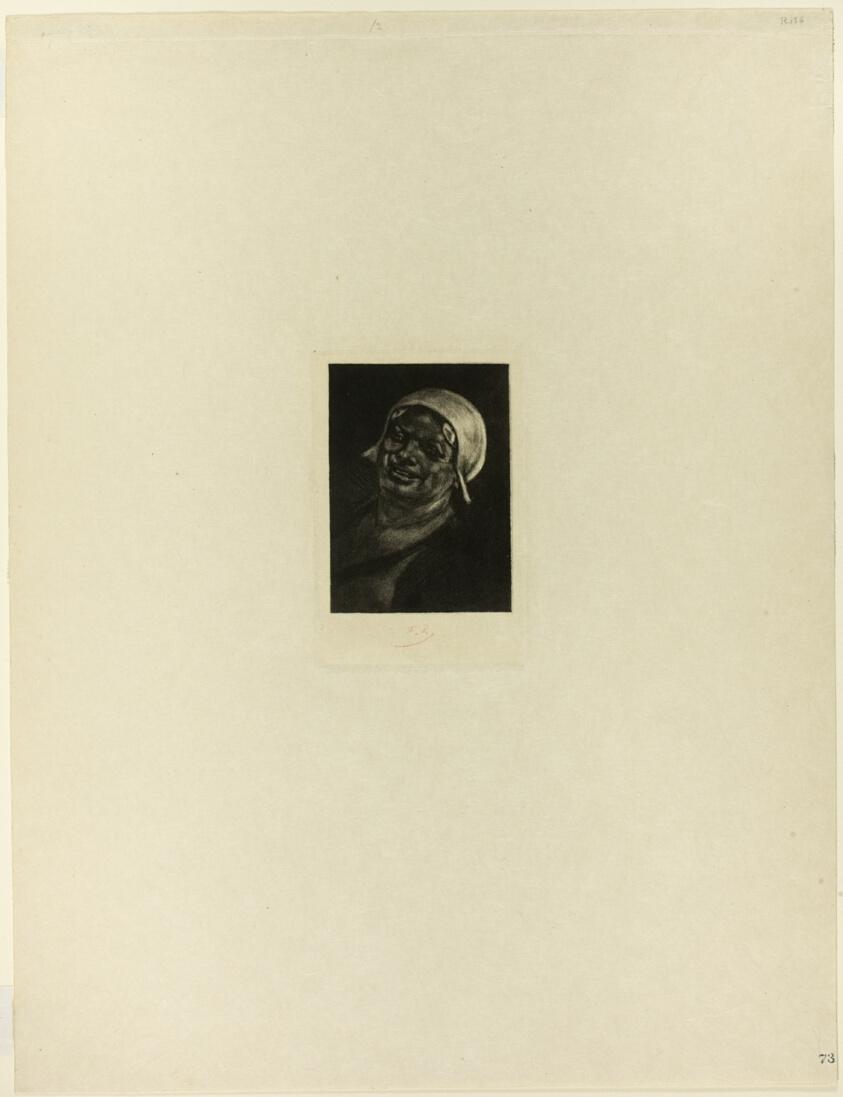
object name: Print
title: Vieille gouge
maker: Félicien Rops (Belgian, 1833-1898)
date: 1889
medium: Aquatint and drypoint on ivory wove paper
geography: Belgium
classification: aquatint; print; prints and drawing